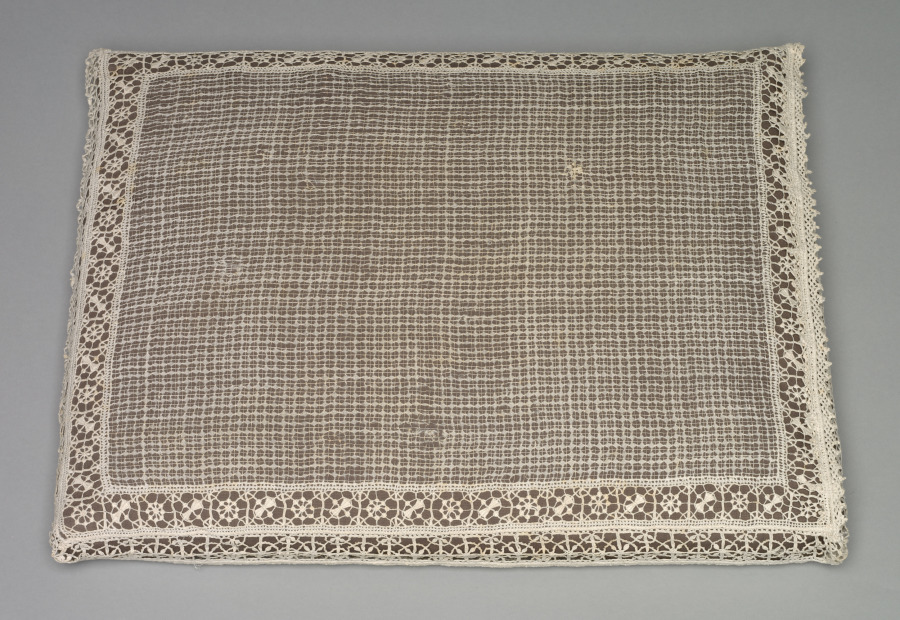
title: Lace Pillow Cover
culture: Italy, Genoa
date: 1600s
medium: Linen: needle lace (drawnwork or Punto Tirato and reticella) and bobbin lace edging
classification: Lace